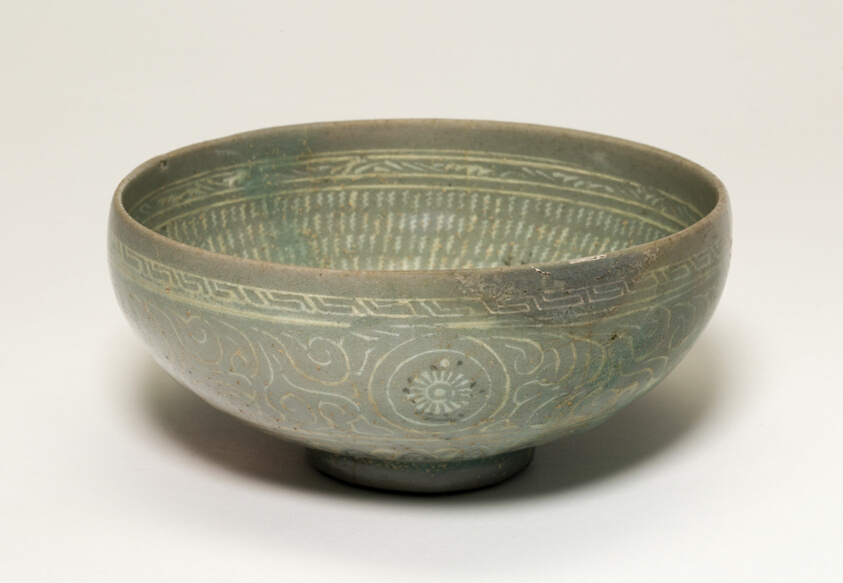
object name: Decorative Arts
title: Bowl with Cranes and Chrysanthemum Flower Heads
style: Korean (culture or style)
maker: Korea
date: Goryeo dynasty (918–1392), late 14th century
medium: Celadon-glazed stoneware with underglaze inlaid decoration of black and white clays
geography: Korea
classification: bowl; porcelain; dish (vessel); asian art; ceramics; decorative arts